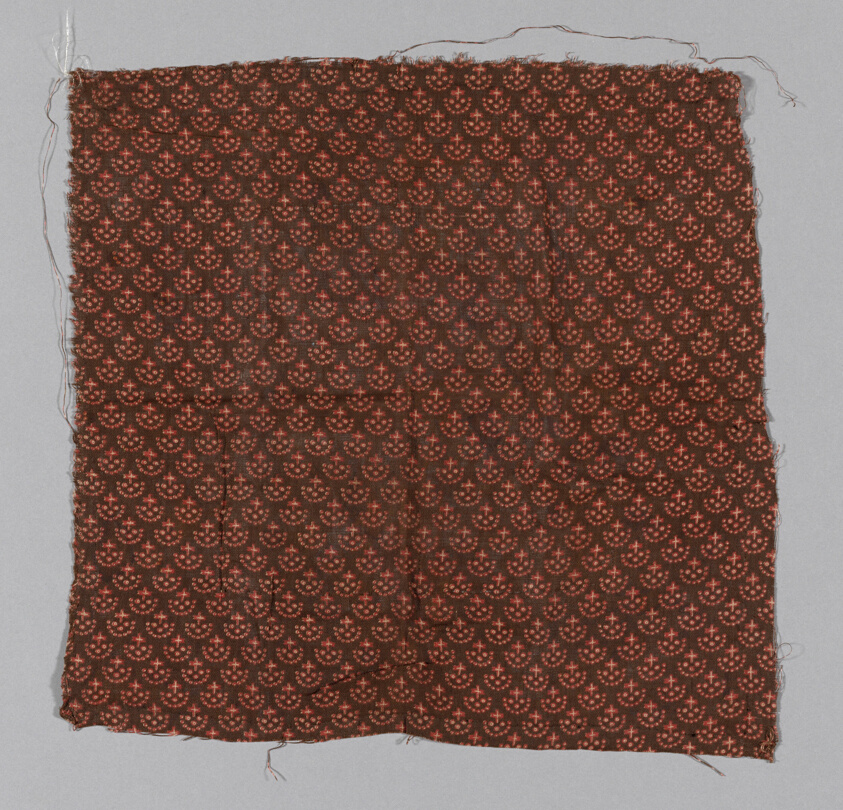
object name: Textile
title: Fragment (Dress Fabric)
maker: Near East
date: 17th/18th century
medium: Cotton, plain weave; possibly block printed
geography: Middle East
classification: textile; weaving - printed; weaving